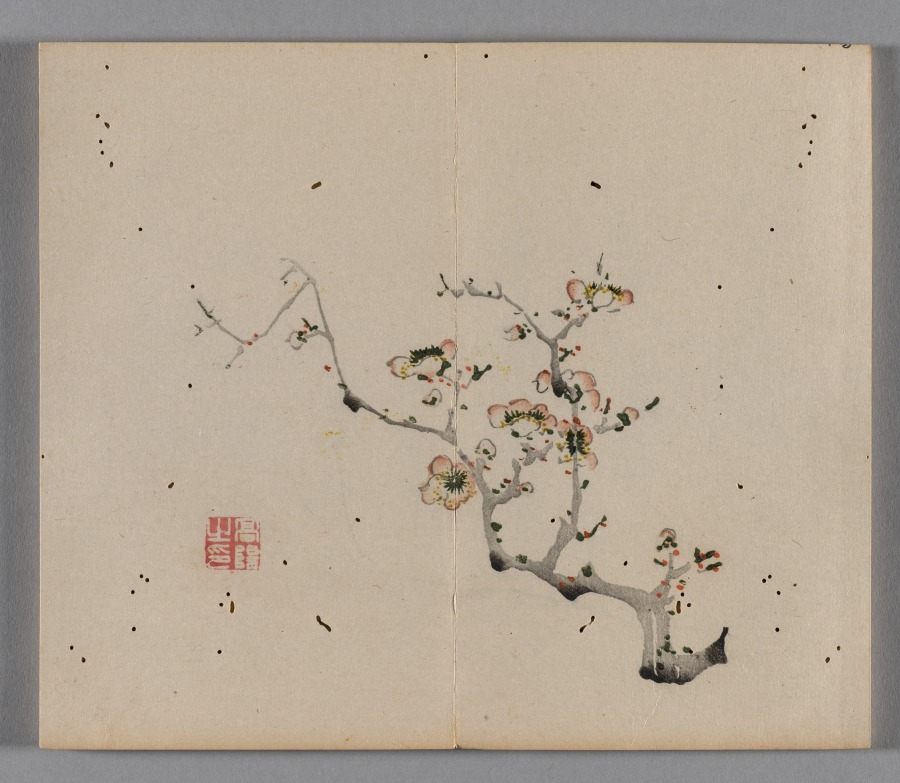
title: Ten Bamboo Studio Painting and Calligraphy Handbook (Shizhuzhai shuhua pu): Miscellaneous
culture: China, Qing dynasty (1644-1911)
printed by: Hu Zhengyan (Chinese, c. 1584–1674)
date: 1633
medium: Woodblock-printed book; ink and colors on paper; first edition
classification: Print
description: Color printing reached a level of perfection in the early 1600s, as seen in this Ten Bamboo Studio Collection of Calligraphy and Painting and the Mustard Seed Garden Manual of Painting (printed 1679 and 1701). The painterly quality, precision in registering (aligning) the woodblocks, and harmonious colors made them the most successful color print editions in Chinese history. Both editions were printed and compiled in Nanjing, spread nationwide, and had a great impact on the arts in Japan and Korea.